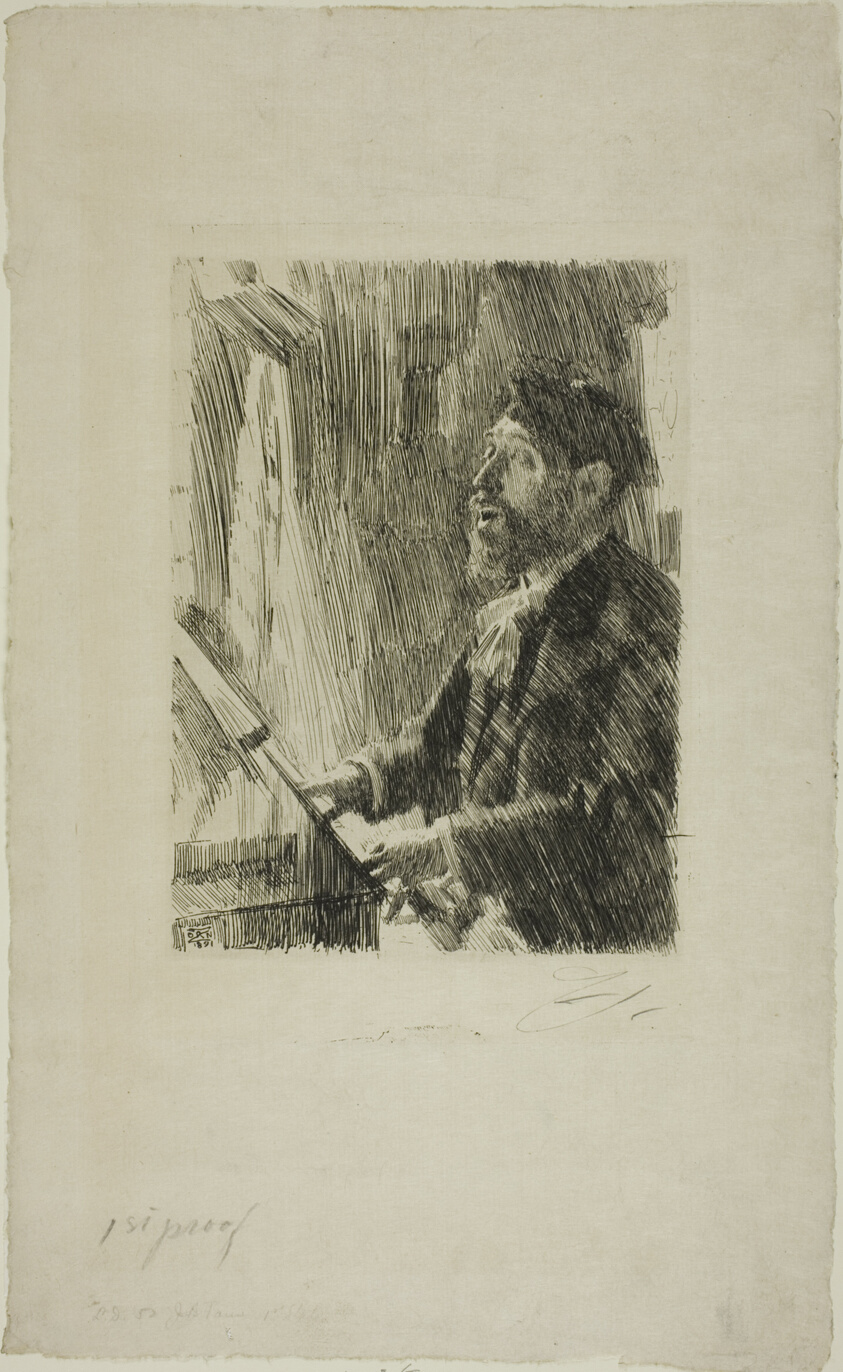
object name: Print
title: J.B. Faure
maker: Anders Zorn (Swedish, 1860-1920)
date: 1891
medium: Etching on ivory wove paper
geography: Sweden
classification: etching; print; prints and drawing